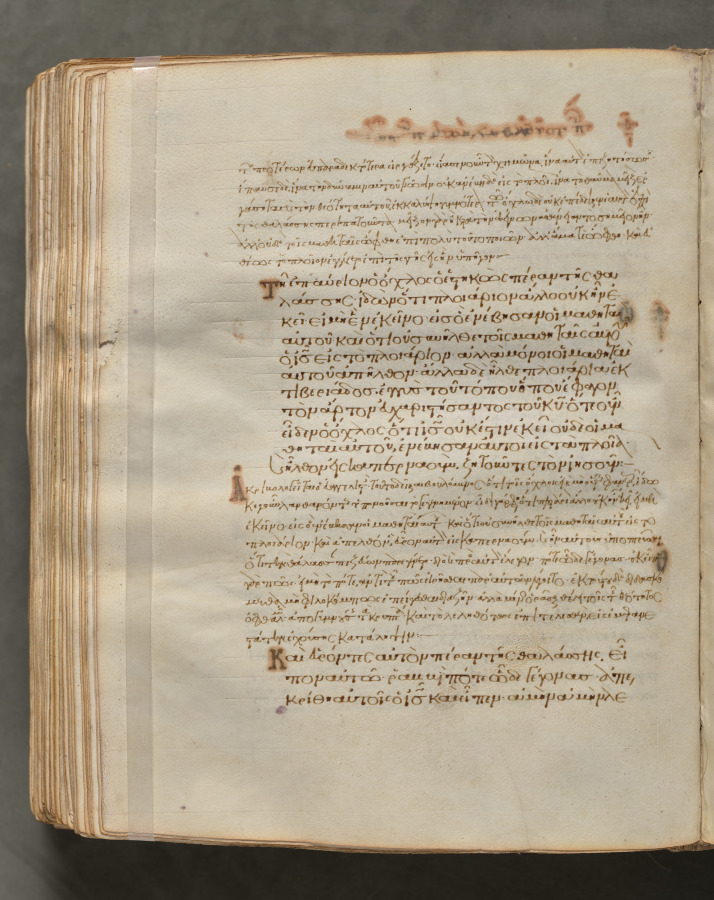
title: Text, folio 350 (verso), from a Gospel Book with Commentaries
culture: Byzantium, Constantinople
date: c. 1000–1100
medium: ink, tempera, and gold on vellum; leather binding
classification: Bound Volume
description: Each of the four gospels in this book opens on a page with brilliantly illuminated borders depicting the author of the text as well as birds—principally peacocks, symbols of the immortality of the soul—and fountains, representing the fountain of life and the salvation of the soul. This volume consists of 428 leaves with texts in Greek. Its level of sophistication suggests that it was probably written and decorated in a monastery in Constantinople.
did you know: Gospel books were carried in procession through Byzantine churches.